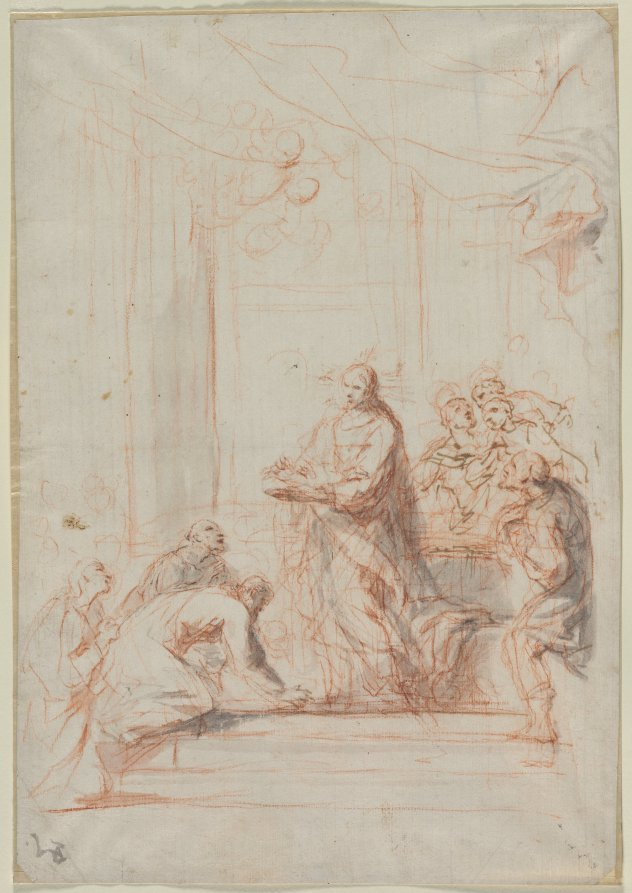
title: Christ Administering the Host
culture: Italy, 18th century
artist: Anonymous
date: 1700s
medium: red chalk with pen and brown ink, brush and gray and red chalk wash, over stylus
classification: Drawing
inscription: VERSO, lower center, in black ink: [Franc?][illegible] B[illegible]